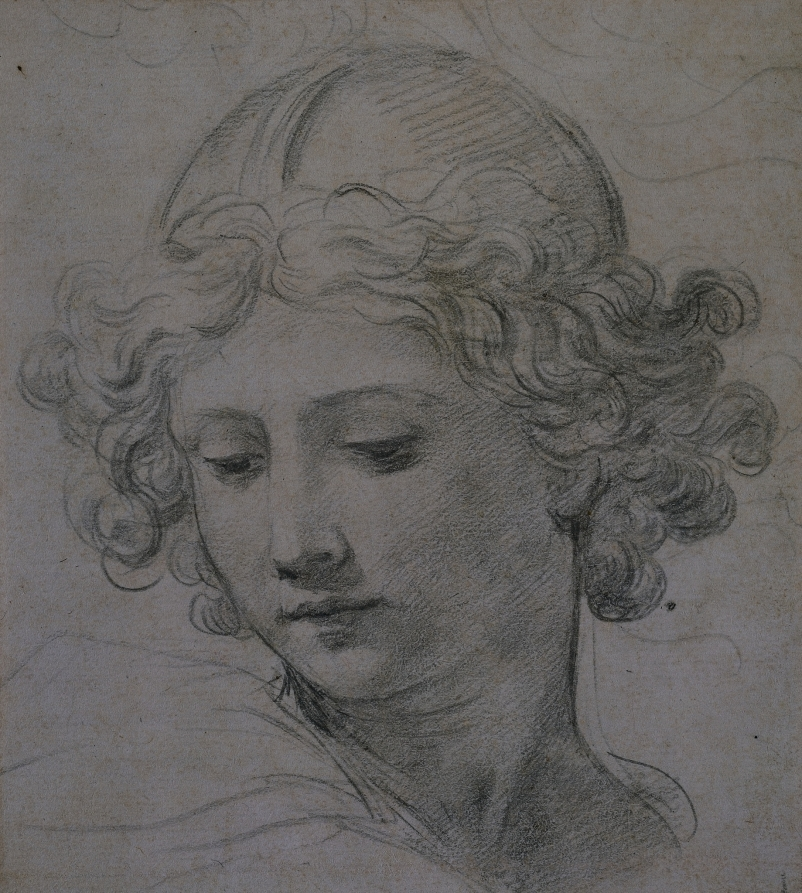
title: Study for the Head of St. Michael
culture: Italy, 17th century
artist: Pietro da Cortona (Italian, 1596–1669)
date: 1633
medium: black chalk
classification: Drawing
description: Pietro da Cortona drew this angelically beautiful face in a style reminiscent of the work of Renaissance master Raphael (1483–1520). Cortona's use of black chalk to develop extremely subtle effects of shading shows the technique at its most refined. He drew this sheet in preparation for a ceiling decoration, Saint Michael and Angels with the Instruments of the Passion, painted in fresco in the church of Santa Maria in Vallicella (better known as the Chiesa Nuova, or "New Church") in Rome, completed in 1633.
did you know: The fresco for which this drawing was made as a preparatory study joins works of art by Peter Paul Rubens as well as relics of the Saint Philip Neri in the Chiesa Nuova in Rome.